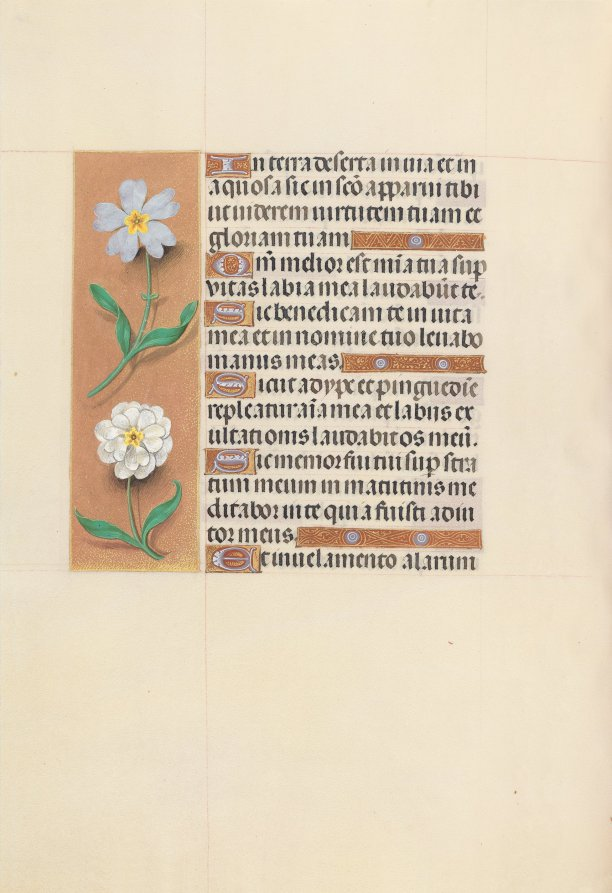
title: Hours of Queen Isabella the Catholic, Queen of Spain: Fol. 117v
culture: Flanders, Ghent and Bruges, late 15th century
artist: Master of the First Prayerbook of Maximillian (Flemish, c. 1444–1519)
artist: and Associates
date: c. 1500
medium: ink, tempera, and gold on vellum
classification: Bound Volume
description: This manuscript was illuminated by a circle of at least five highly organized manuscript painters active in the Flemish cities of Ghent and Bruges. The principal illuminator was Alexander Bening, who painted the majority of the book's miniatures. Manuscripts produced by this circle of artists are renowned for the decoration of their borders, which typically feature a rich variety of realistically-painted flowers, birds, and butterflies. This prayer book, called a book of hours, was intended not for a cleric, but for the private devotions of a lay person-in this case, Isabella the Catholic, Queen of Spain (1451-1504). Isabella's coat of arms embellishes the book's frontispiece. It is unlikely that the book was commissioned by the Queen herself; rather, she probably received it as a diplomatic gift from someone courting her patronage, perhaps Cardinal Francisco Jimenez de Cisneros. A Franciscan friar, Jimenez was dependent upon Isabella for his advancement, first to the post of Queen's confessor in 1492, and then to Archbishop of Toledo in 1495.